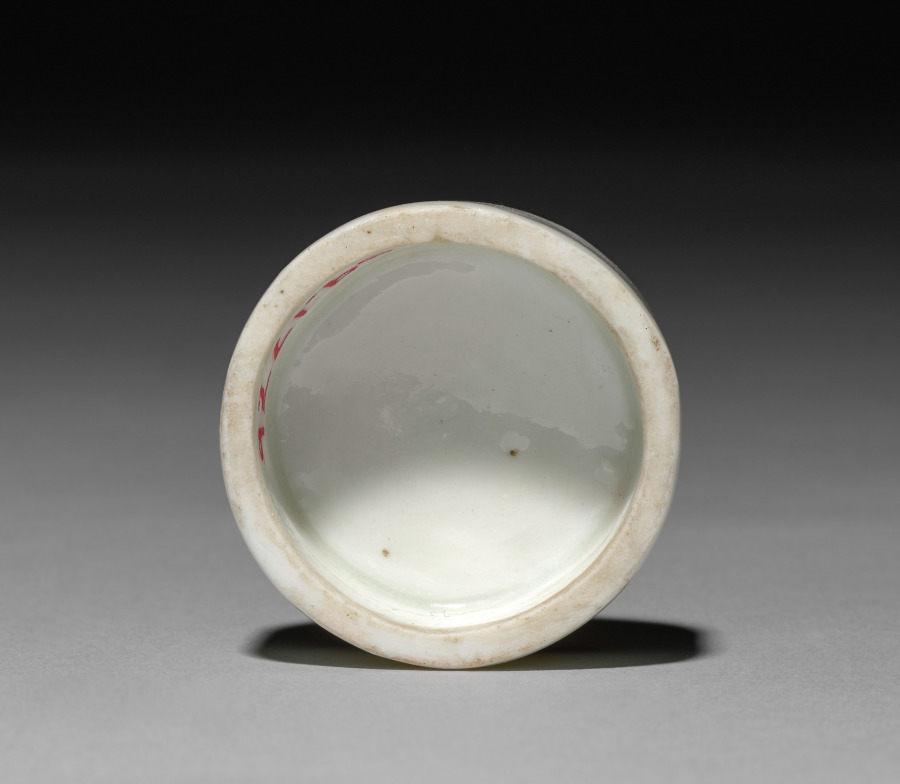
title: Tea Caddy (lid)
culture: Germany, Meissen, 18th century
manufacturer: Meissen Porcelain Factory (German, est. c. 1710)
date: c. 1735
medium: porcelain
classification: Ceramic